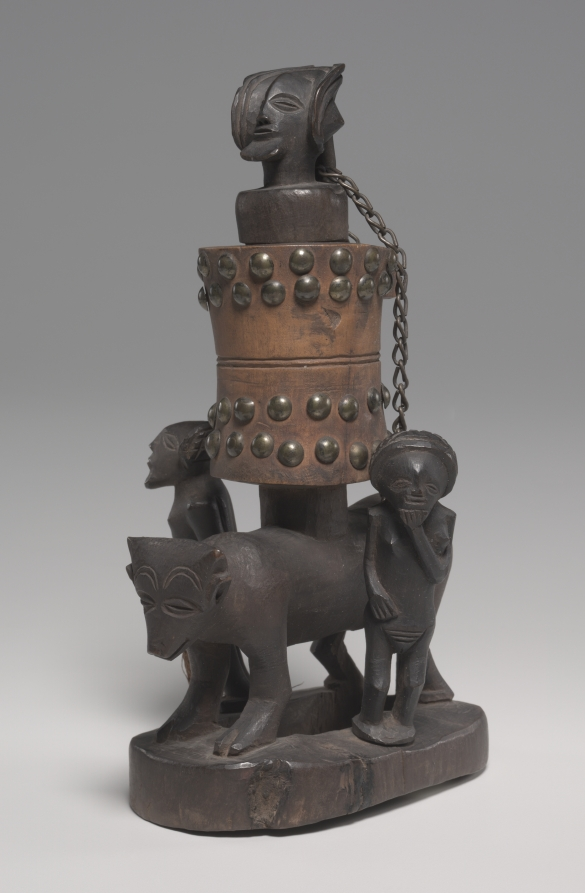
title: Snuff Mortar (Tesa Ya Ma Kanya)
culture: Africa, Central Africa, Angola or Democratic Republic of Congo, Chokwe carver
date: late 1800s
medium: Wood, upholstery studs, cloth, and metal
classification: Tool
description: Tobacco, introduced into Africa in the 16th century, became the prerogative of leaders. As patrons of the arts, Chokwe chiefs commissioned elaborate pipes and mortars as part of their court regalia for display during public gatherings.